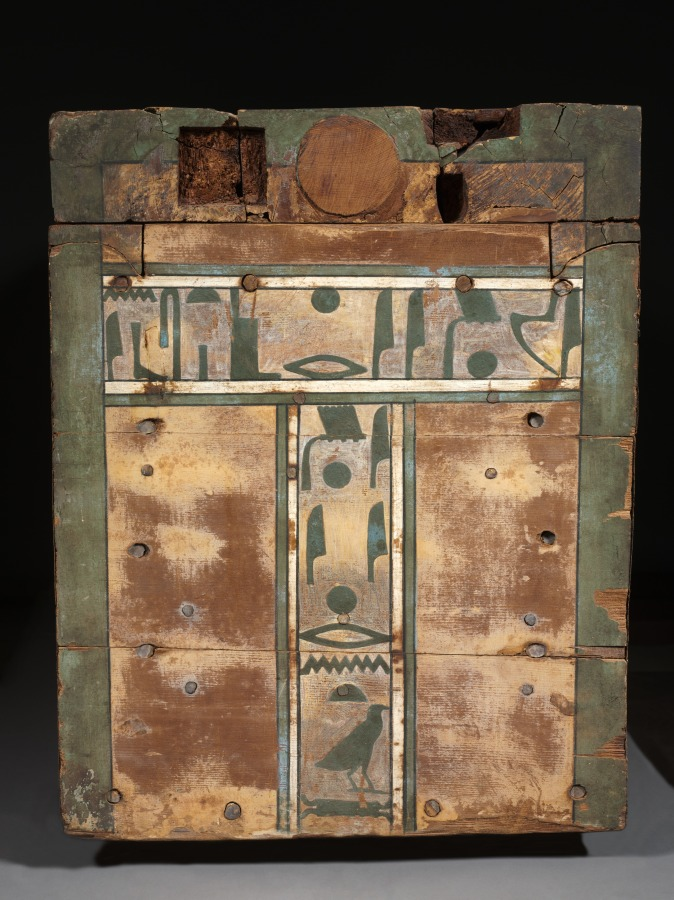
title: Coffin of Senbi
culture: Egypt, Meir, Middle Kingdom, mid-Dynasty 12, reign of Amenemhat II to Sesostris III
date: c. 1918–1859 BCE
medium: gessoed and painted cedar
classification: Funerary Equipment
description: The most common type of coffin during the Middle Kingdom took the shape of a rectangular box with lid. The mummy inside was placed on his left side, facing east, his head behind the two magical eyes. These—in the shape of human eyes, to which have been added the markings of a falcon's head—were supposed to enable him to behold the rising sun, reborn daily. The long horizontal inscriptions are prayers to Anubis (god of embalming) and Osiris (god of the dead) for offerings of food and drink and other items necessary for survival in the afterlife. The short vertical inscriptions place him under the protection of the gods of earth, sky, air, and moisture, as well as various funerary deities.